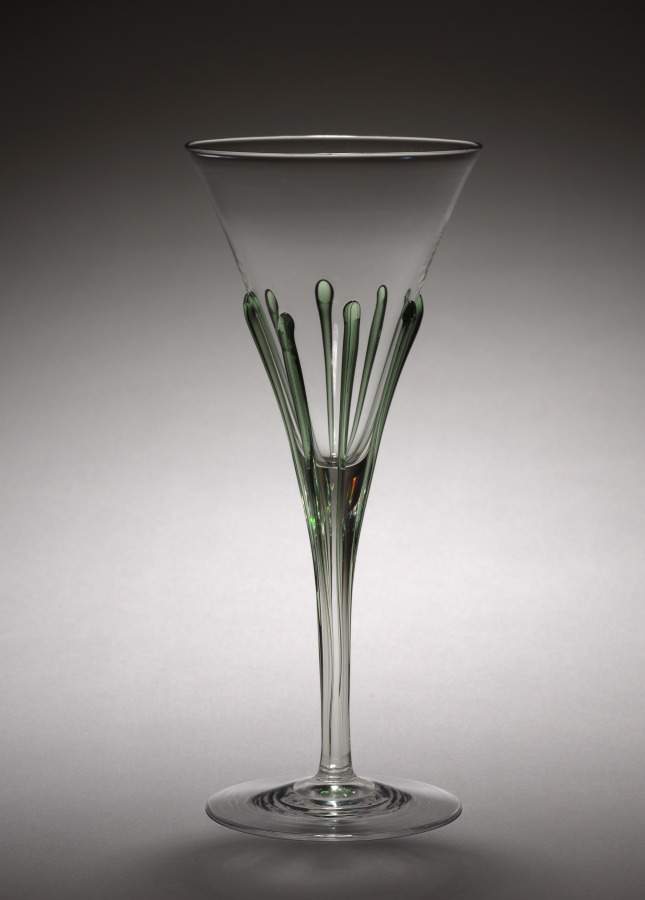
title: Goblet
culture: England, early 20th Century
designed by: Harry Powell (British, 1835–1922)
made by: Whitefriars Glasshouse (British)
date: c. 1900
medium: glass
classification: Glass